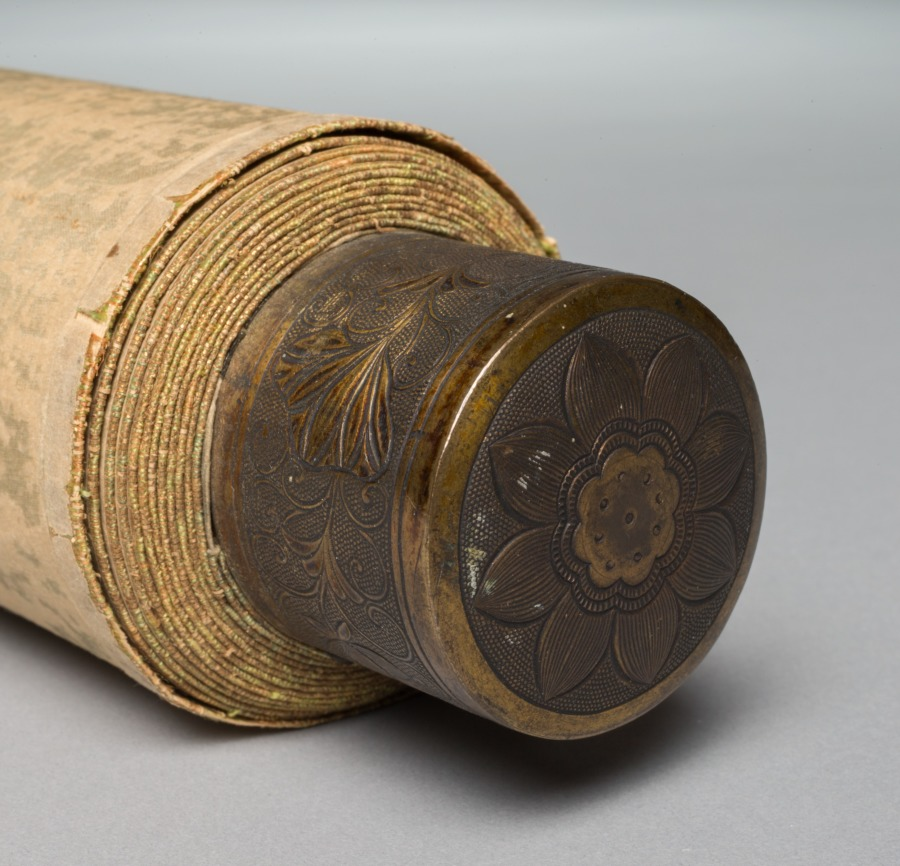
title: Shakyamuni Triad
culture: Japan, Kamakura period (1185–1333)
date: c. 1200–1333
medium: hanging scroll; ink, color, gold and cut-gold on silk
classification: Painting